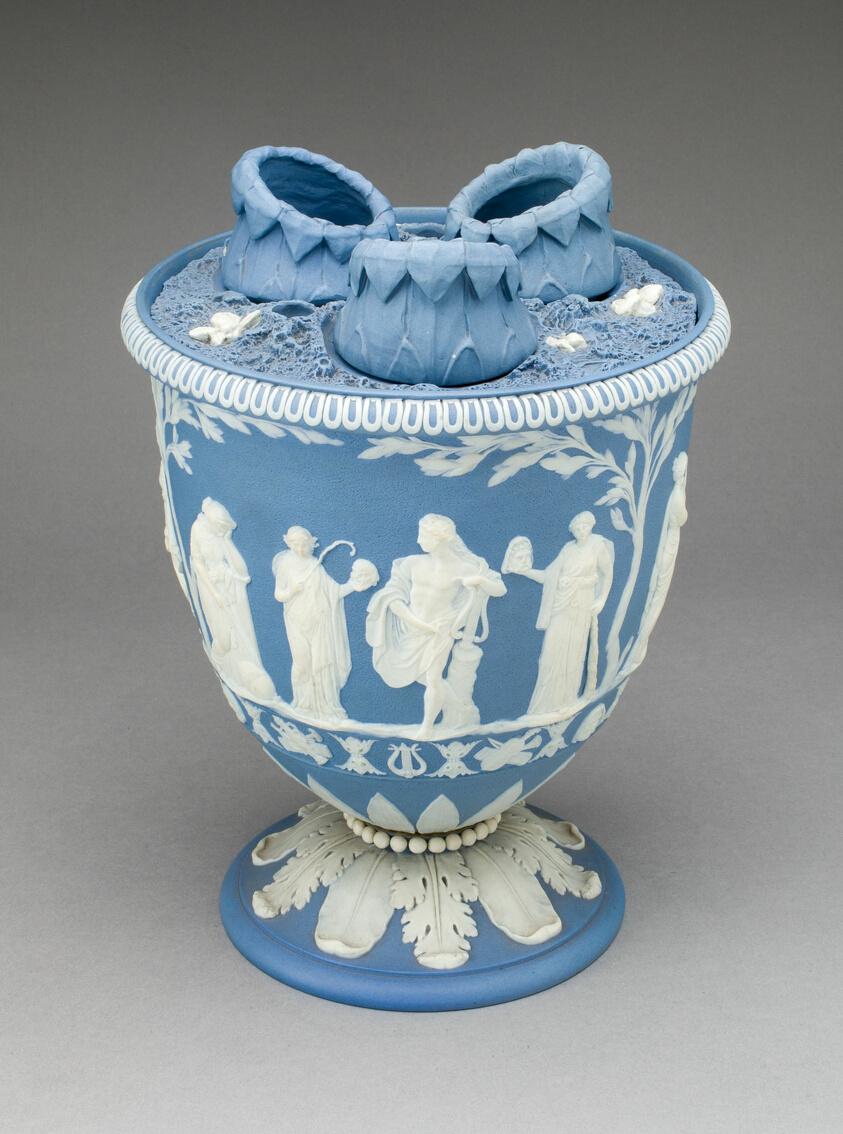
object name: Ceramics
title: Bulb Pot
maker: Wedgwood Manufactory (England, founded 1759)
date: c. 1790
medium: Stoneware (jasperware)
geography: Burslem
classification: vase; cachepot; vessel; ornamental piece; stoneware; european decorative arts; ceramics